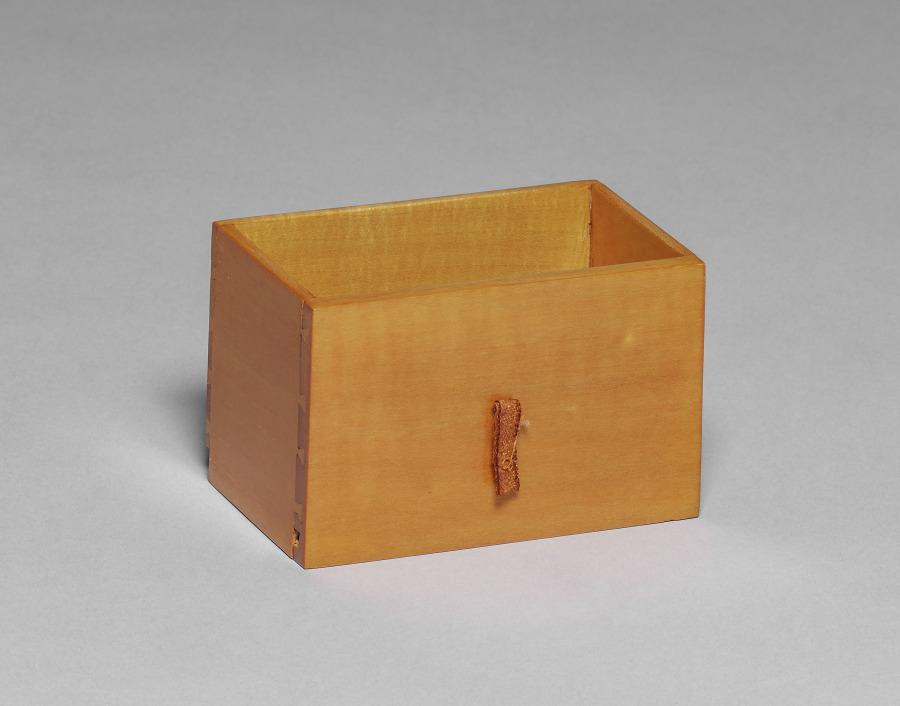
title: Concealed Drawer for a Globe Work Table (Globustisch)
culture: Austria, Vienna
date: c. 1810–15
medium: Burl walnut veneer, mahogany, ebony, satinwood, gilt wood, painted wood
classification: Furniture and woodwork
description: Work tables resembling globes were the usual form for a lady's sewing or writing table around 1800 in Austria. Combining moving parts, secret compartments, and highly finished decoration, these tables were also a way for the cabinetmaker to show off his skill. The tripod supports and temple-like architectural quality of both the exterior and interior decoration reflect the fashionable taste for neoclassical style, or Biedermeier as it was called in Austria, where Vienna was the center of such elaborate furniture production.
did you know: The top half of the globe rotates upward to reveal hidden compartments for sewing tools, threads, and unfinished fabric pieces.